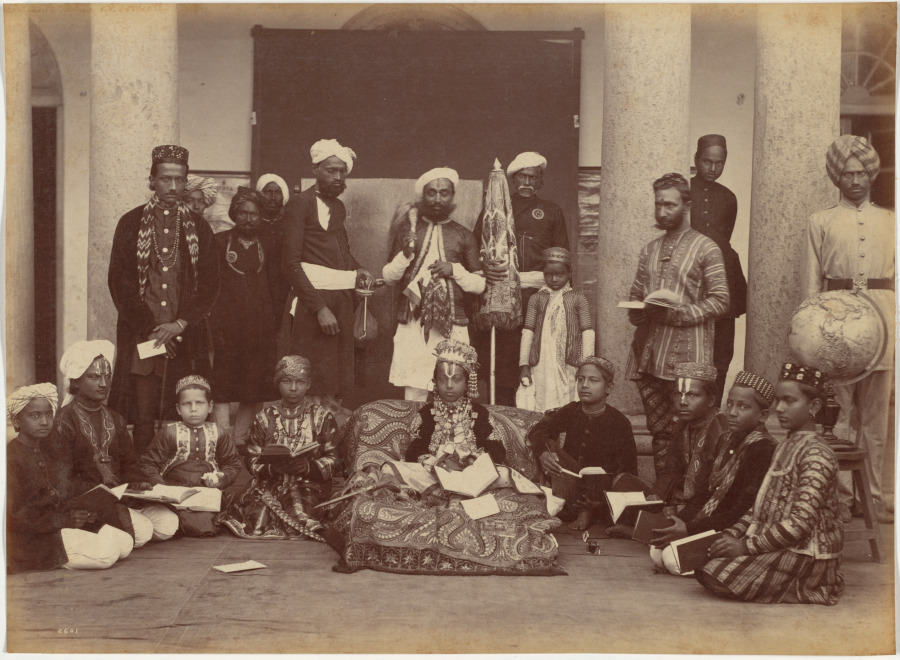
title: Maharaja of Rewa and Classmates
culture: India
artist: Raja Deen Dayal (Indian, 1844–1905)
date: 1886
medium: albumen print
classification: Photograph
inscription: No visible inscriptions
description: Deen Dayal uses the arrangement of people and the architecture to point to the most important person in the photograph. Here, the Maharaja of Rewa is placed front and center. “Sardars,” inscribed on the top picture’s mount, refers to the military officials surrounding him. After 1858, British influence dictated that Indian rulers be educated in European history and ideas as well as their local culture and history. In the bottom image, the young maharaja is shown with Indian teachers, but the instructional tools are Western: bound books and a raised relief globe (with Asia visible).